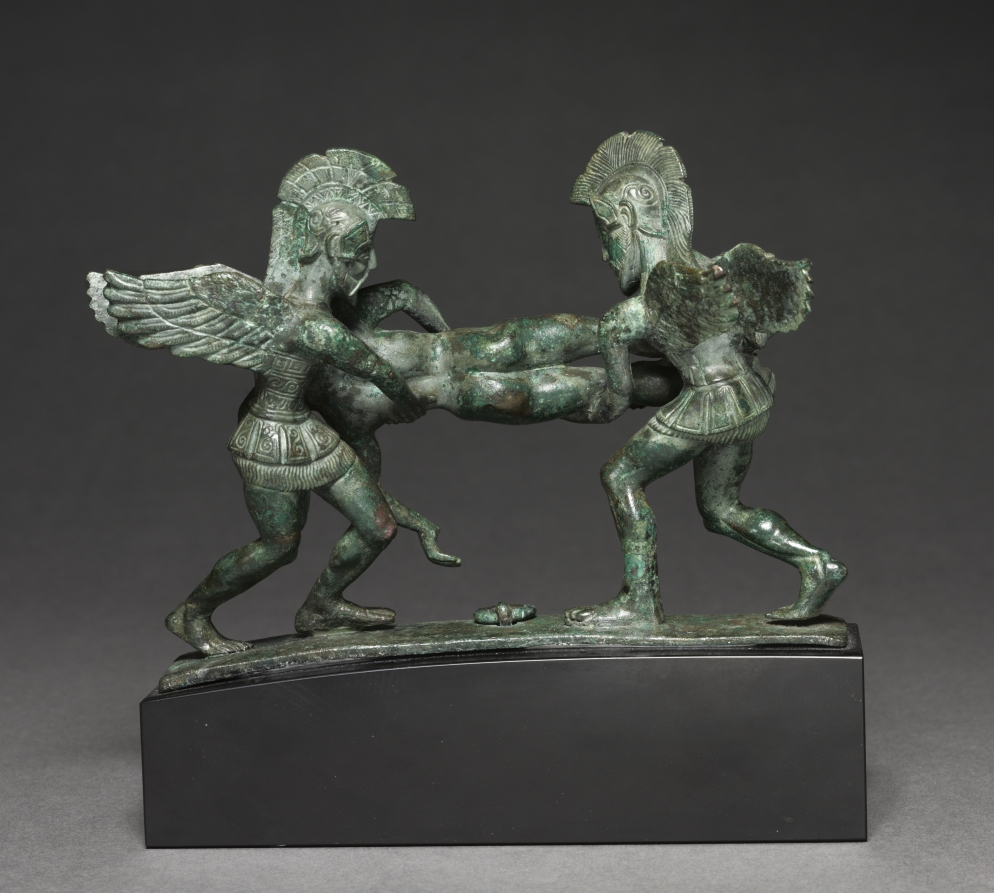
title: Sleep and Death Cista Handle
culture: Etruscan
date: 400–375 BCE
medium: bronze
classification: Sculpture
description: Designed for attachment to the lid of a large bronze cista, a cylindrical lidded box, these three figures probably represent Sleep (Hypnos) and Death (Thanatos) holding the body of Sarpedon. A son of Zeus who helped to defend Troy from invading Greek forces, "godlike Sarpedon of the brazen helmet" fell at the hands of Patroclus, as told by Homer in Book XVI of the Iliad. Apollo then intervened to protect the body, removing it from danger and entrusting it to the two winged deities, as depicted here and in a number of other ancient artworks, Greek and Etruscan alike. If not Sarpedon, the fallen warrior could be Memnon, the son of Eos and Tithonos slain by Achilles.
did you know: These three figures were cast in eight separate pieces, then welded together and attached to the rectangular base.